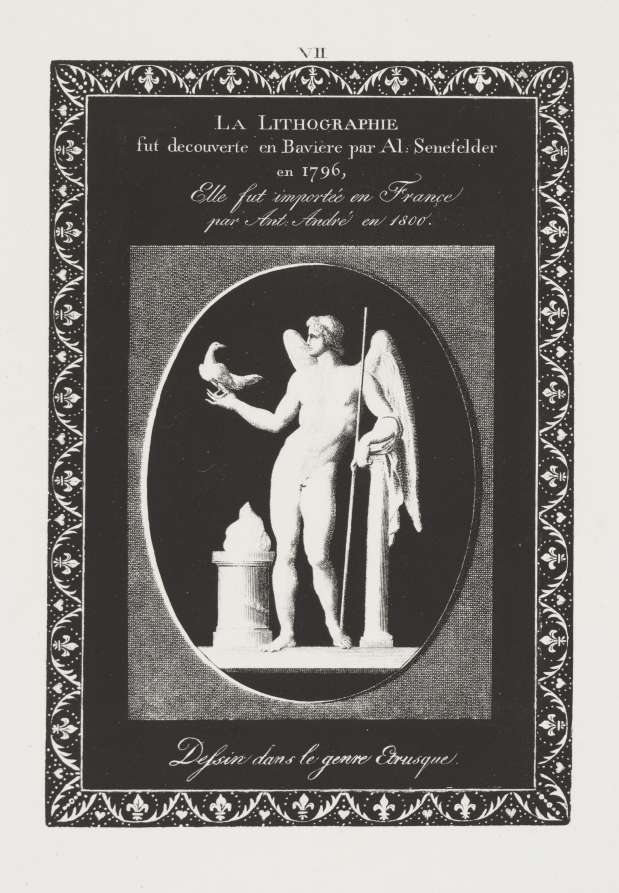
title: Art of the Lithograph: Dedication Sheet, Plate VII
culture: Germany, 19th century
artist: Alois Senefelder (German, 1771–1834)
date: 1819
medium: lithograph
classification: Print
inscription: On plate: above: La Lithographie / fut decouverte en Bavière par Al: Senefelder / en 1796, / Elle fut importée en France / par Ant: André en 1800; lower: Dessin dans le genre Etrusque